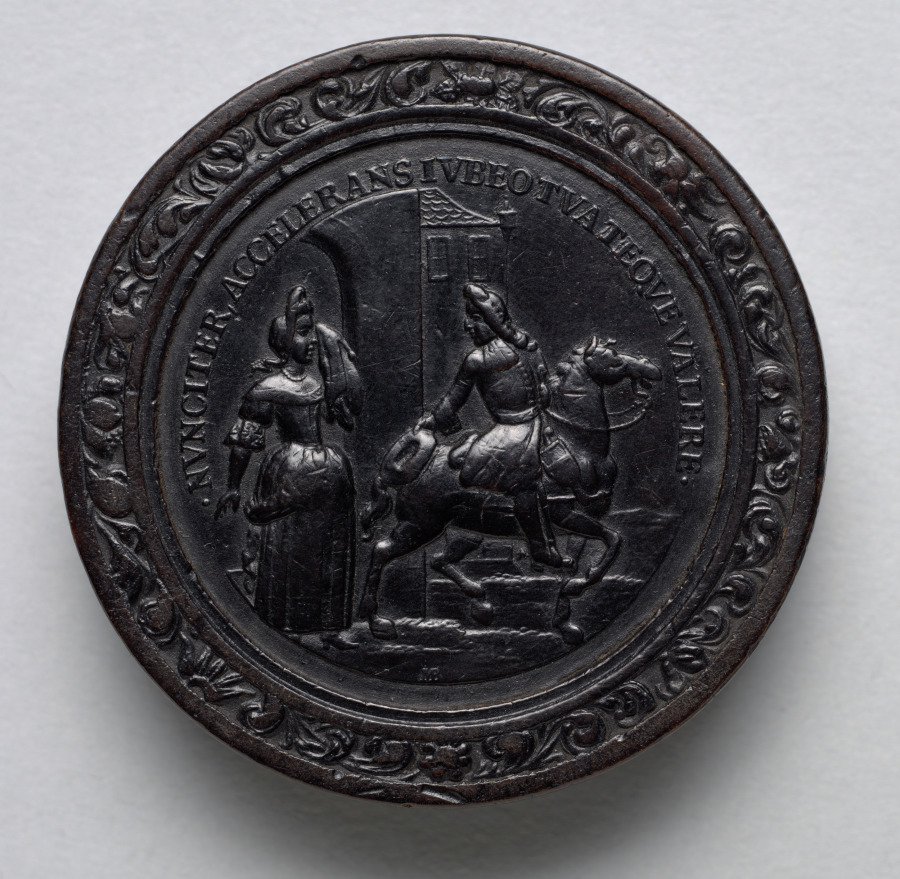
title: Gaming Piece (obverse)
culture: Germany, late 17th-early 18th Century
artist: Martin Brunner (German, 1659–1725)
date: c.1700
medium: wood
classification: Furniture and woodwork